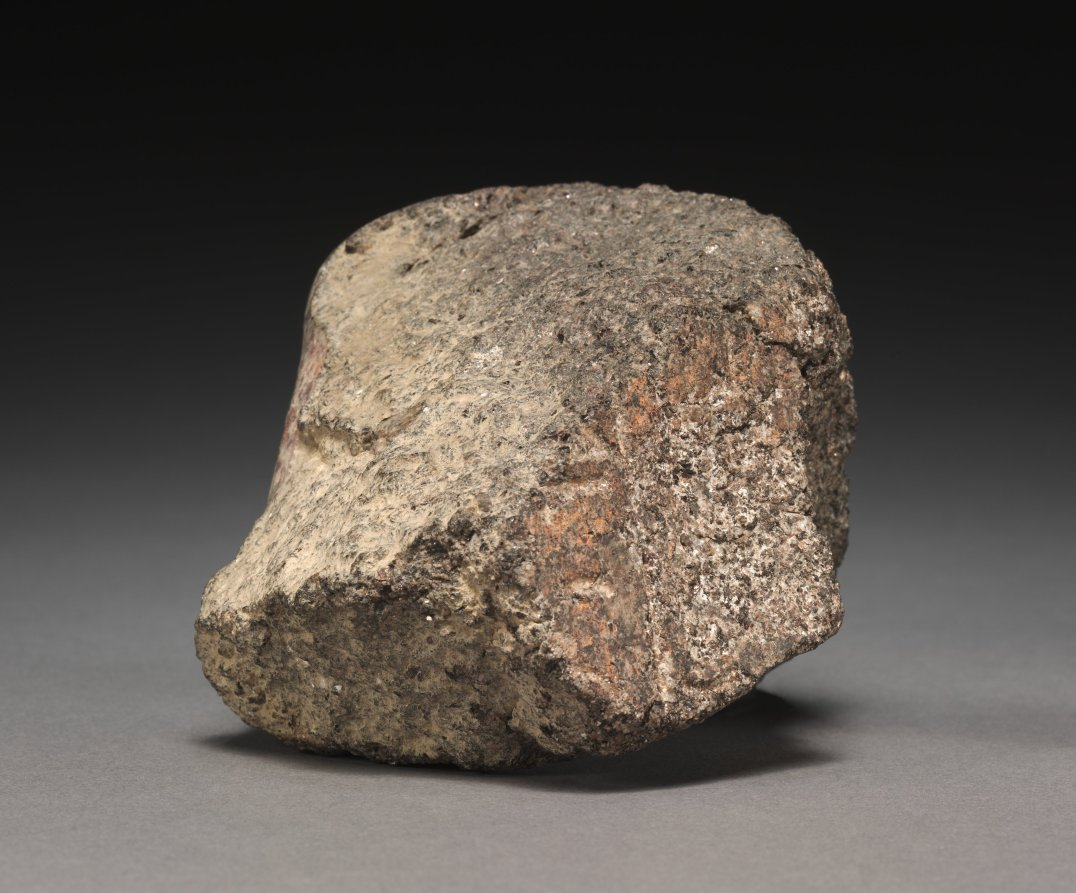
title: Male Head, perhaps from a Pair Statue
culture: Egypt, New Kingdom (1540–1069 BCE), Dynasty 18, reign of Amenhotep II (1425–1400 BCE)–reign of Tuthmosis IV (1400–1390 BCE)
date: 1401–1391 BCE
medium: gray granite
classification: Sculpture